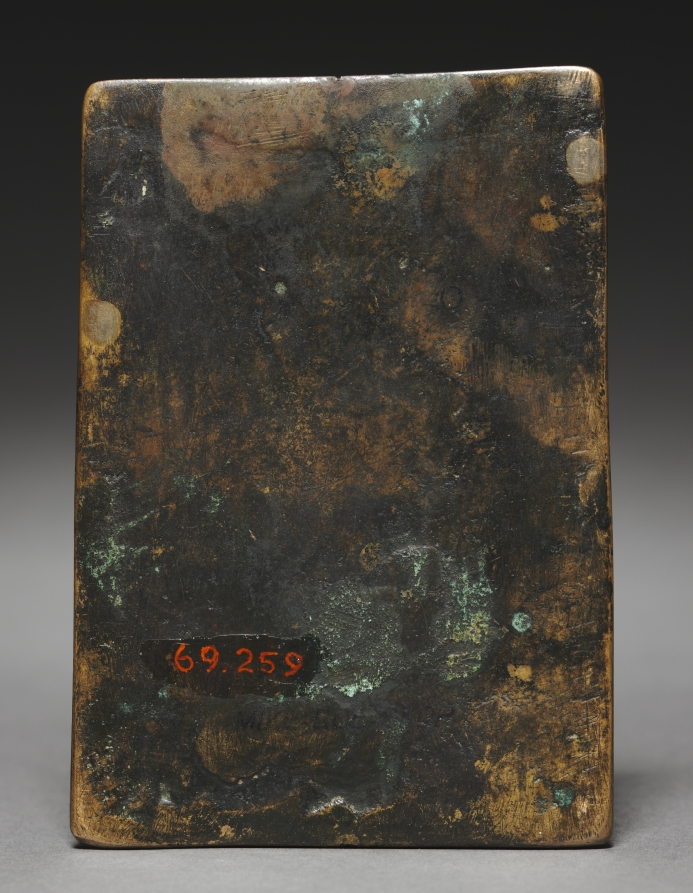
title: The Crucifixion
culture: Italy, 16th century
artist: cast after a model by Moderno (Italian, 1467–1528)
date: 16th century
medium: bronze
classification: Sculpture